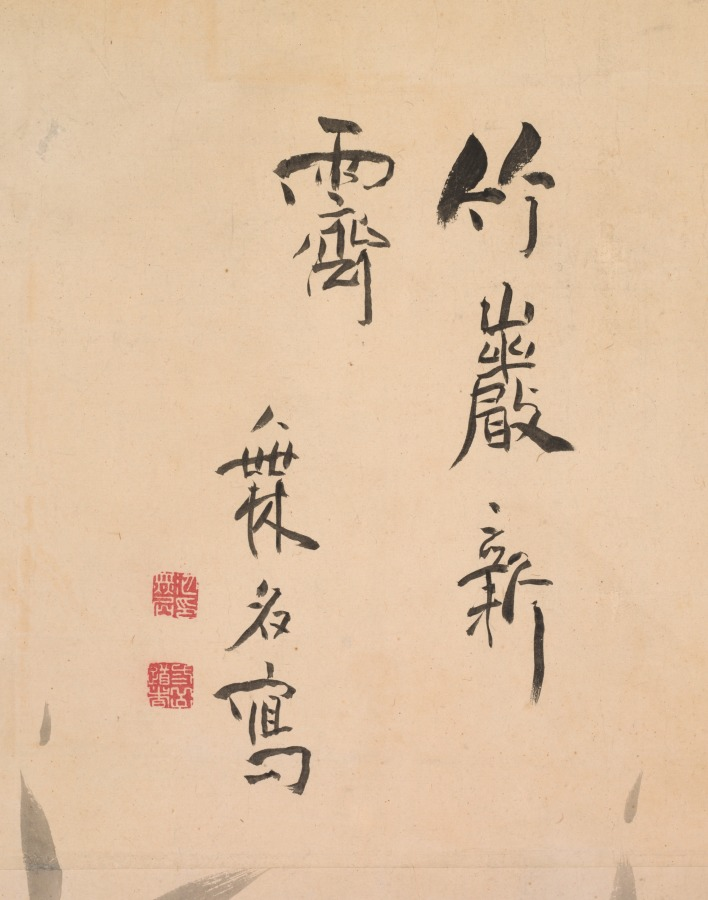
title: Bamboo and Rocks in Clearing Skies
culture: Japan, Edo period (1615–1868)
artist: Ike Taiga (Japanese, 1723–1776)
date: mid-1700s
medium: Two-panel folding screen; ink on paper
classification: Painting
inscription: signed, titled, and sealed by the artist on the top of the left panel. Set of two seals appears once on each panel: after the signature on the left panel and lower left on the right panel. The first of the two square seals reads "ike no mumei," the second reads "sangaku doja."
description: The title written on this screen corresponds to one on a design in Taiga’s Brush Methods (大雅堂画法). The concept conveyed is one of scenery and spirit refreshed by precipitation. In the screen, a rain-filled stream rushes from the mountains into a river. A village is nestled amid giant bamboo in the distance. A platform-like flat rock in the foreground invites us to step into the scene.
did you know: Ike Taiga ranks among the most creative painters of the Edo period: he produced over 1,000 compositions in various formats.